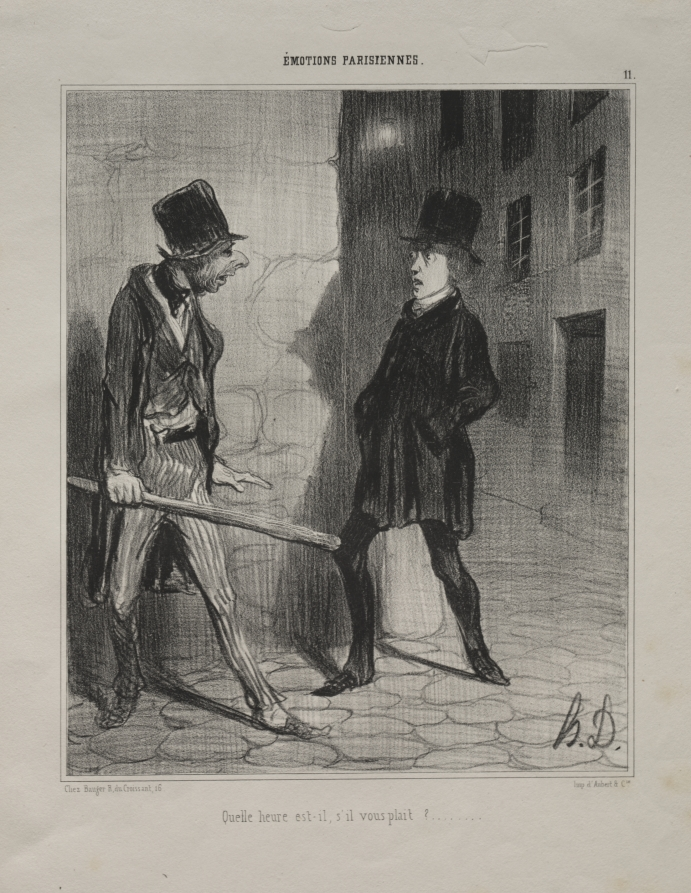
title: What Time is it, Please?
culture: France, 19th century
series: Parisian Emotions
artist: Honoré Daumier (French, 1808–1879)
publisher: Aubert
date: 1839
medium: lithograph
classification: Print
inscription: Above image, printed: ÉMOTIONS PARISIENNES. / 11. ; Below image, printed: Quelle heur est-il, s'il vous plait?.........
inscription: Upper margin, pencil: HD 1640 ; lower margin, printed: Chez Bauger R, du Croissant, 16 / imp. d'Aubert & Cie ; in pencil: 118 ; verso, pencil: TR 1080/11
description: This print was published in Le Charivari (November 24, 1839) as plate 11 from the series Parisian Emotions.